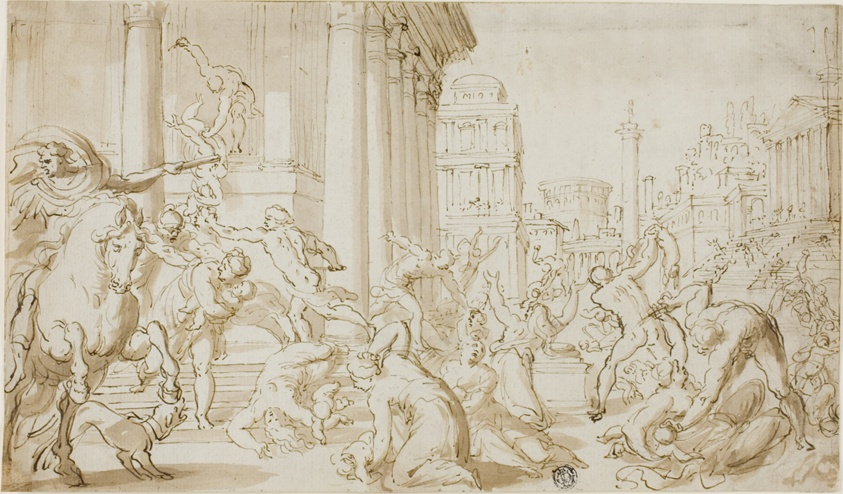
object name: Drawing and Watercolor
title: Massacre of the Innocents (recto); Figure Sketches (verso)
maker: School of Nicolas Poussin (French, 1594-1665)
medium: Pen and brown ink, with brush and brown wash, (recto), and graphite and pen and brown ink (verso), on ivory laid paper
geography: France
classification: pen and ink drawings; drawings (visual works); prints and drawing